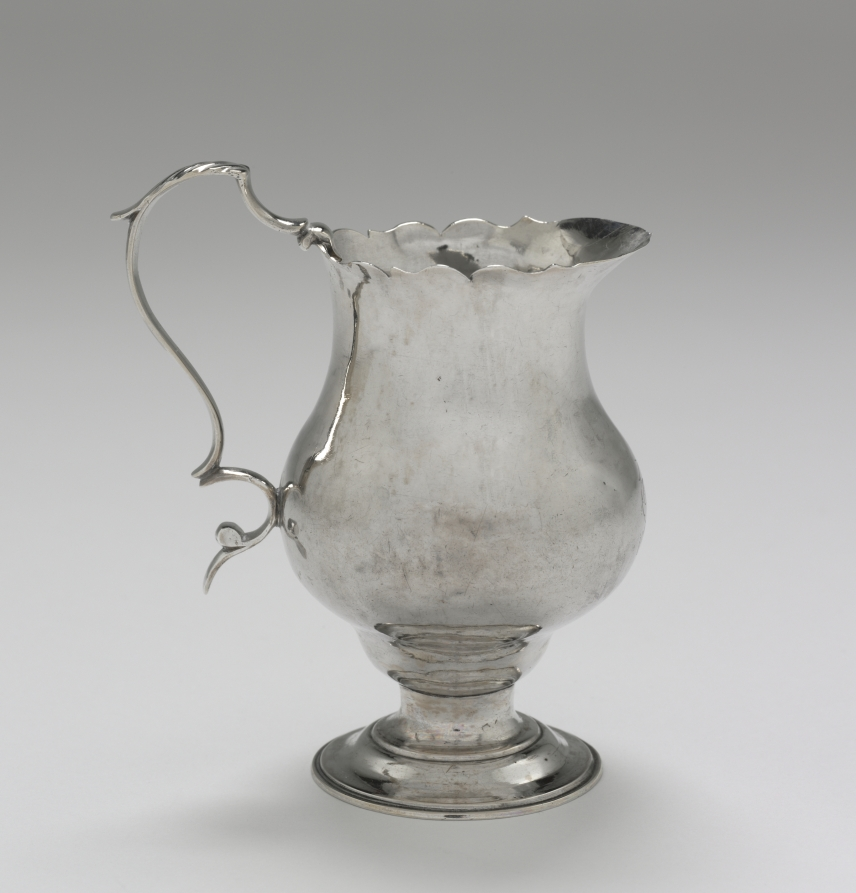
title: Cream Pitcher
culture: America, Massachusetts, Boston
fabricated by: Paul Revere II (American, 1735–1818)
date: c. 1765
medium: silver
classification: Silver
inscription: "P . . .H/to/P . . .E" in block letters under foot, and "MHP" in bright-cut script on front, opposite handle.